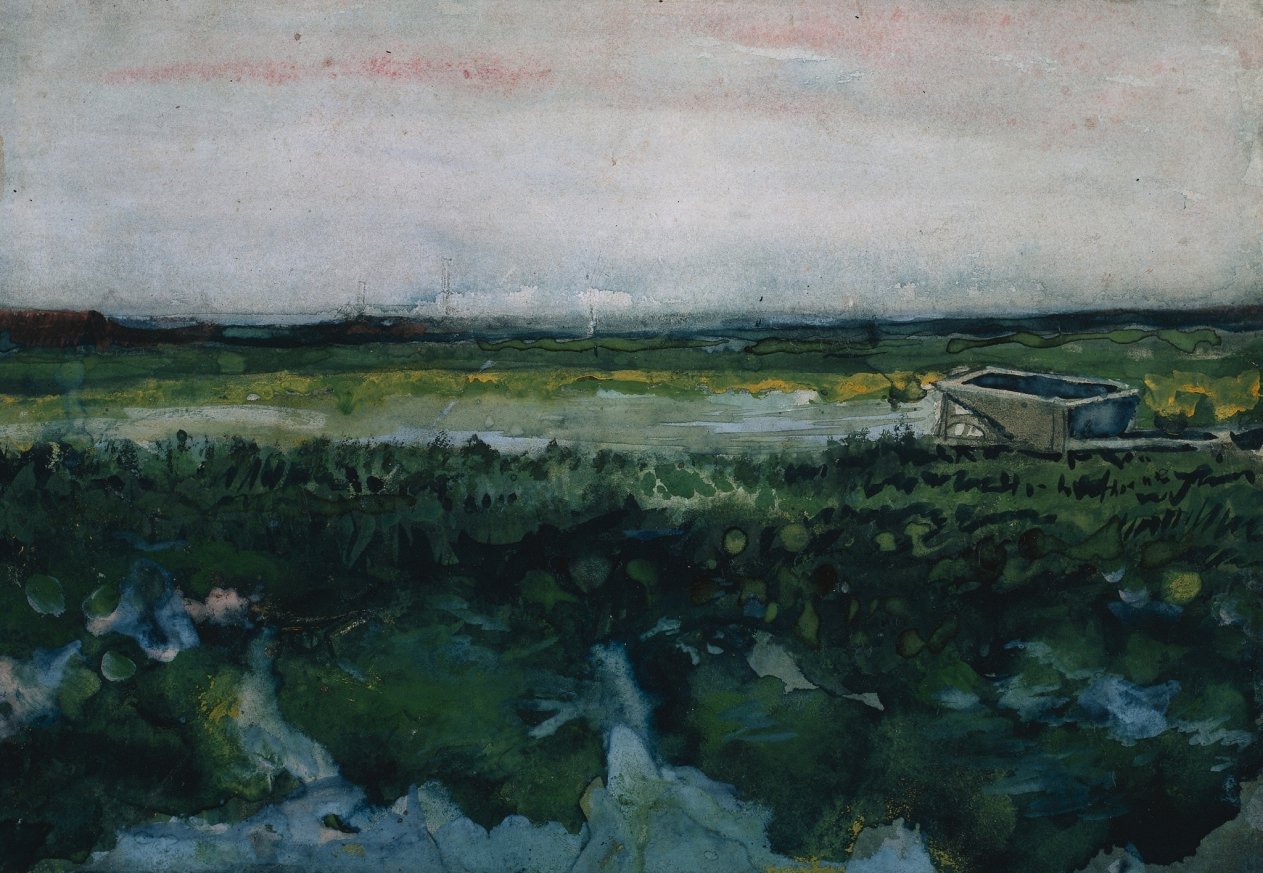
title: Landscape with Wheelbarrow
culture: Netherlands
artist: Vincent van Gogh (Dutch, 1853–1890)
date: 1883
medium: watercolor and opaque watercolor with black chalk on cream paper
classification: Drawing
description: In September 1883 Van Gogh left the bustling Dutch city of The Hague in search of open countryside in which to paint. He moved to Drenthe, a village in northeastern Netherlands that was virtually untouched by the Industrial Revolution. He described the barren terrain as supremely beautiful and serene: "What tranquility, what expanse, what calmness in this nature." With a limited palette of steely greens and cool blues, Van Gogh masterfully portrayed one of the region’s expanses of heath—"a vast plane vanishing into infinity"—illuminated by the lilac hues of the evening sky.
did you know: Vincent van Gogh made this watercolor just over a year after beginning to work professionally as an artist.